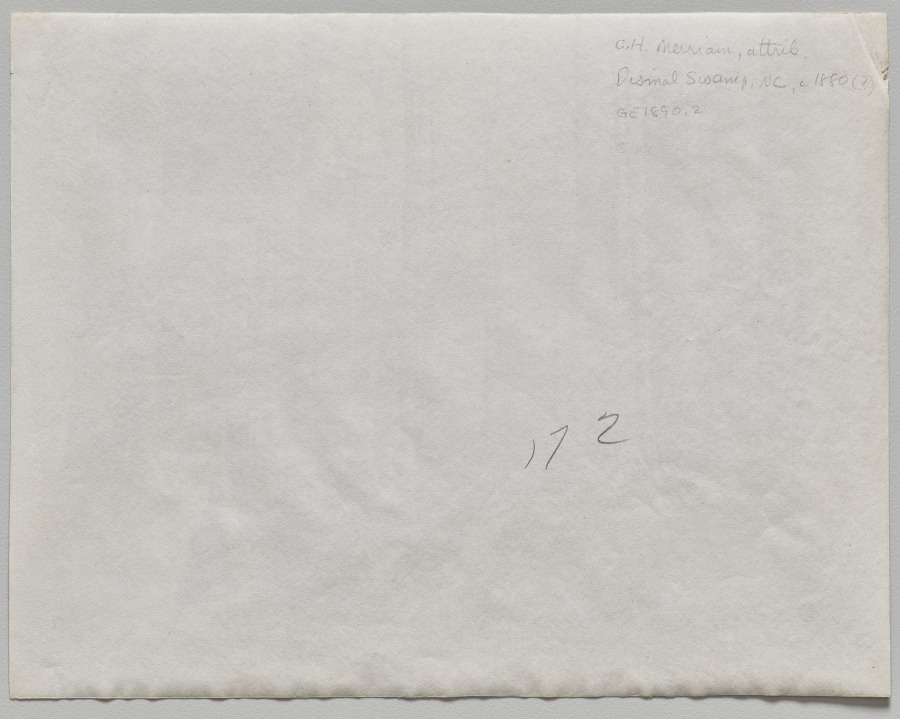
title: Great Dismal Swamp, Virginia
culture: America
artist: Israel Cook Russell (American, 1852–1906)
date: c. 1872–90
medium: albumen print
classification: Photograph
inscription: Handwritten in graphite on verso of photograph a/o mat: "C.H. Merriam, attrib.; Dismal Swamp, NC, c. 1880 (?); GE 1890.2; 172; 450"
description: Israel Cook Russell’s view of the Great Dismal Swamp, which straddles the border between Virginia and North Carolina, evokes both the locale’s abundance of timber and its sense of desolation. Russell, a celebrated geologist, took care to express the geological and biological forces that shaped landscapes but also to create images of artistic value.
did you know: From the 1700s through the Civil War, the Great Dismal Swamp’s timber was harvested by slave labor, yet the swamp also housed numerous people who had escaped slavery.